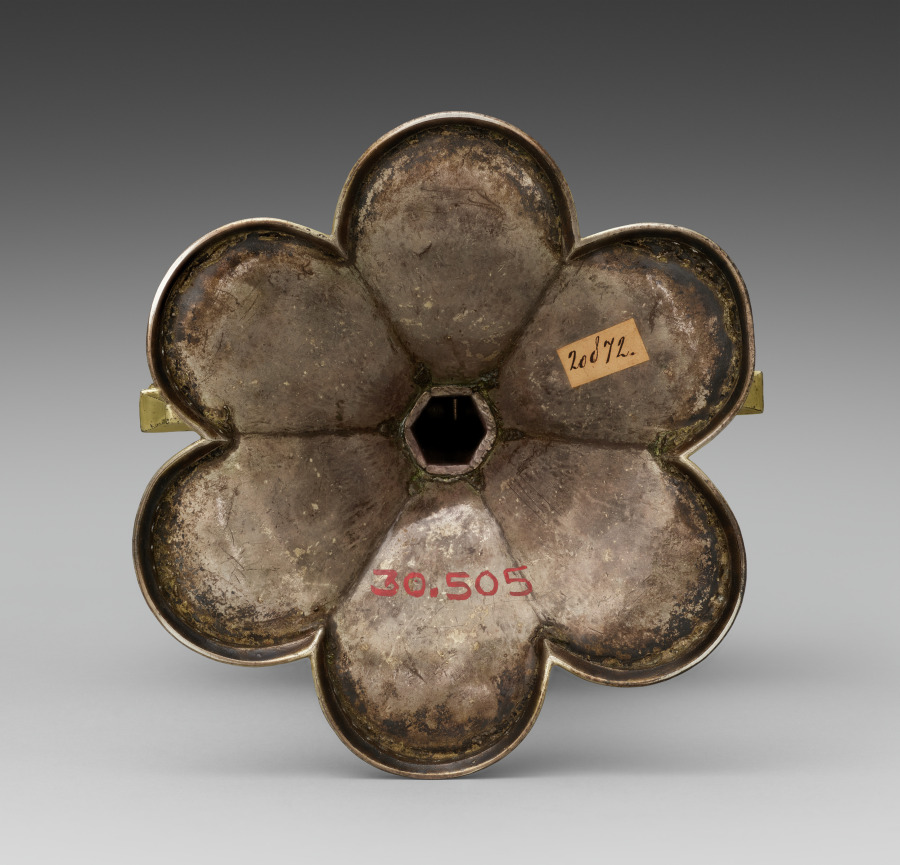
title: Monstrance with the "Paten of Saint Bernward"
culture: paten: Germany, Lower Saxony, Hildesheim; monstrance: Germany, Lower Saxony, Brunswick, Gothic period, paten: 12th century; monstrance: 14th century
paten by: Saint Oswald Reliquary Workshop (German)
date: c. 1180–1190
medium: silver, gilded silver, niello, rock crystal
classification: Metalwork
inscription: located in monstrance: two slivers of the True Cross surrounded by parchment with the inscription: DE SIGILLO DOMINI. Paten inscribed: +EST.CORPVS.IN.SE.PANIS.QVI.FRANGITVR.IN.ME:VIVET.IN ETERNVM. QVI.BENE.SVMIT.EVM. (outer rim); +HVC.SPECTATE. VIRI.SIC.VOS MORIENDO.REDEMI.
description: Designed to facilitate the display and veneration of ten relics, this sumptuous ostensorium (from the Latin ostendere, meaning "to show") is one of the most unusual reliquaries in the Guelph Treasure. Elements of contemporary Gothic architecture in miniature frame an elaborately decorated liturgical paten, the shallow disc or plate used for the elevation of the Eucharist during Mass. Fragments of the True Cross are enclosed behind a rock crystal in the gable, while other saintly relics, each wrapped in silk and identified by inscriptions, are visible only from the back. The paten is inscribed on its outer rim with the words "The bread which is broken in me is the body itself. He who receives it in good faith shall live in eternity." Another inscription surrounding the image of the enthroned Christ at the paten's center, reads, "Behold, o men, I have thus redeemed you with my death." Symbols of the four Evangelists and personifications of the four cardinal virtues complete the paten's iconographic program.